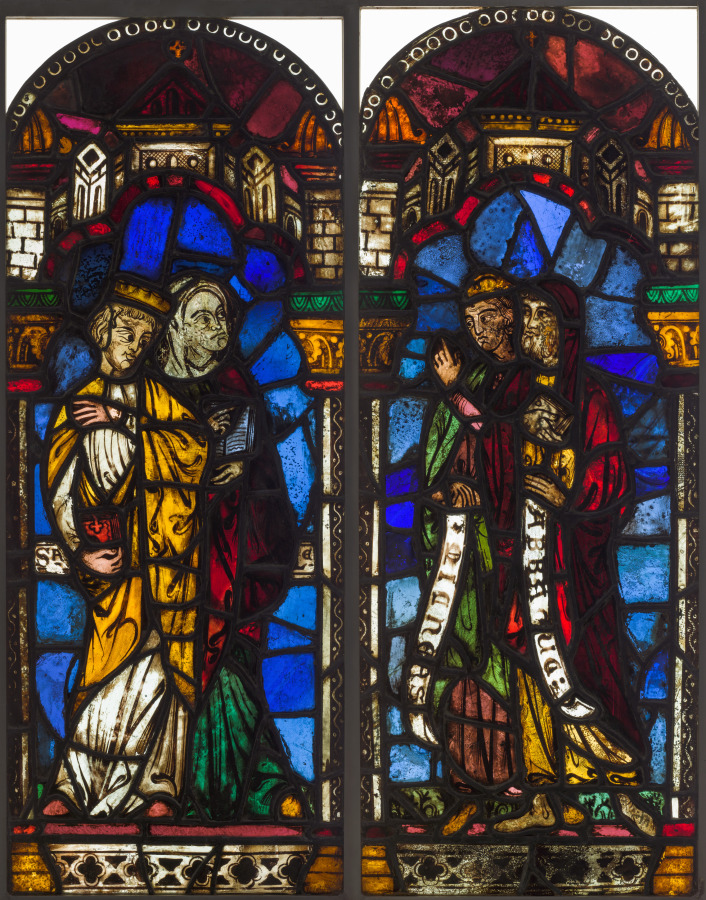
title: Panels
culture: France, early 13th century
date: c.1200–1225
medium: pot-metal and white glass, silver stain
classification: Glass